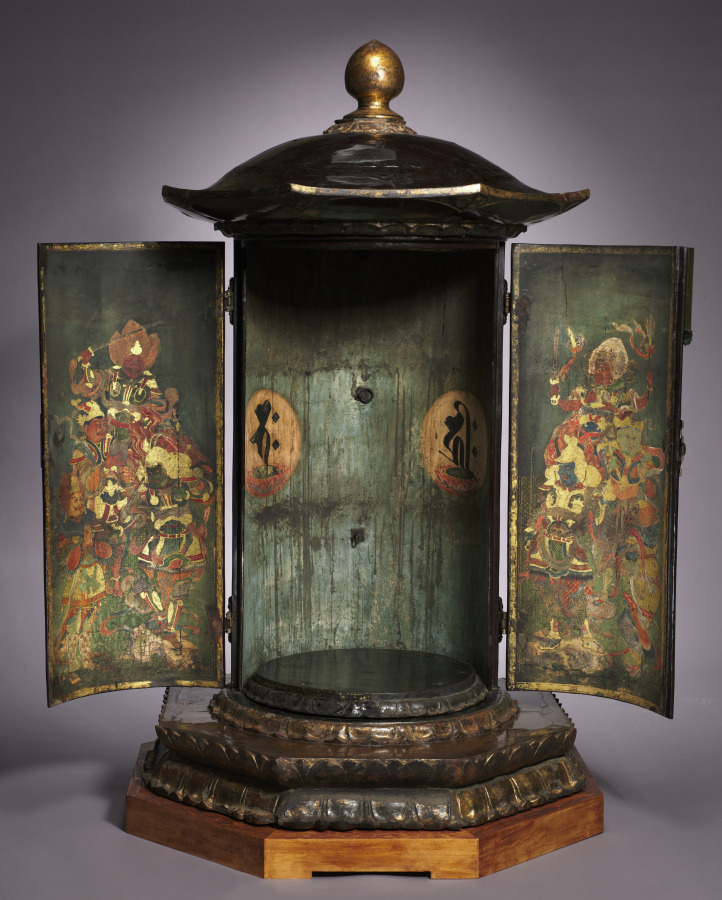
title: Repository for the Great Perfection of Wisdom Sutra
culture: Japan, Heian period (794–1185)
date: late 1100s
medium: lacquered wood with ink, color, gold, cut gold, and metalwork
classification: Lacquer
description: This repository is one of a pair that once contained the scrolls of a religious text called the Great Perfection of Wisdom Sutra. Two discs painted on the back have the sacred syllables representing the Buddha Shakyamuni and the Buddha Amida. Eight of the 16 benevolent but fierce looking deities who protect the text appear on the doors.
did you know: The mate to this object is in the Nara National Museum in Japan.